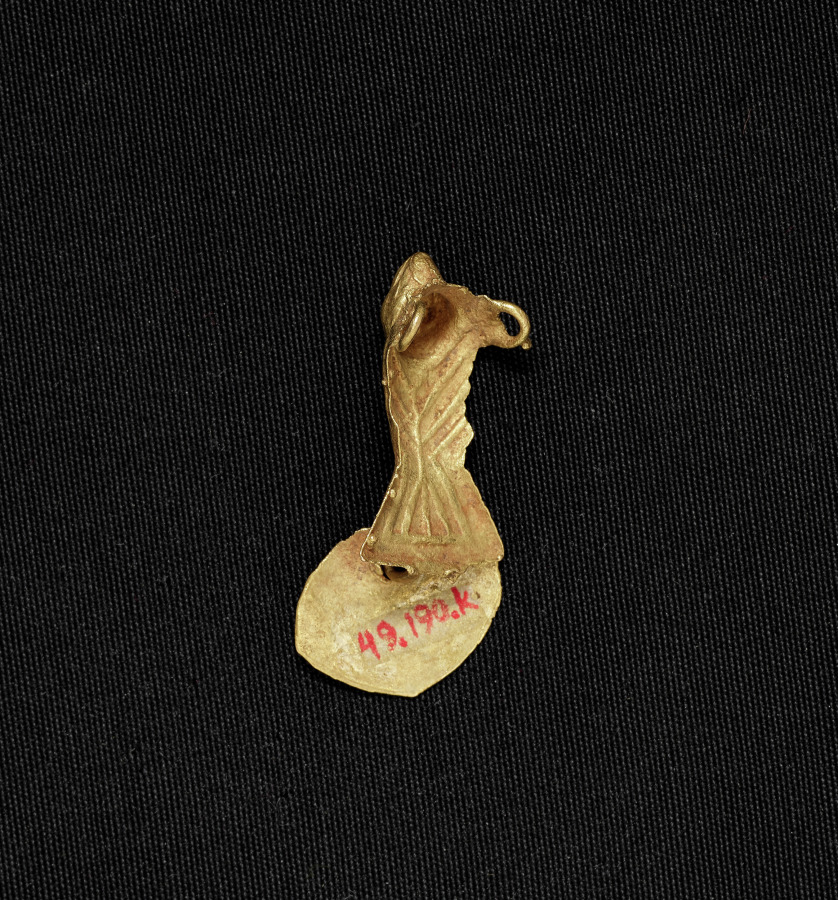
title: Bird Bead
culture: Colombia, Muisca style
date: c. 900–1550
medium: cast gold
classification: Jewelry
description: Muisca metalwork divides into two categories: ornaments to be worn, such as these, and offering figurines, in the case to the right. The elaborate bird pendant features delicate herringbone moldings, openwork patterns, and wing details-all part of the wax model from which the pendant was cast (see nearby computer animation). The dangles were attached after casting.